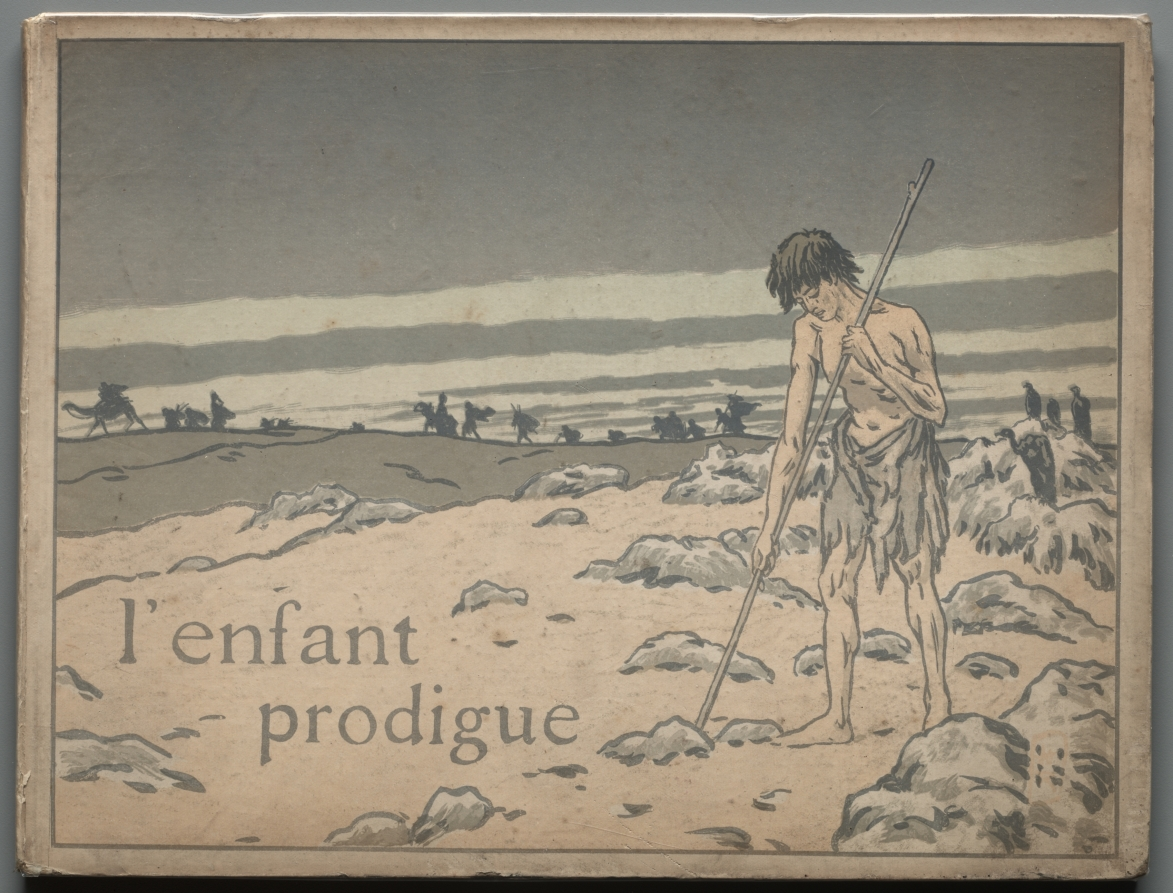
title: The Prodigal Son: Cover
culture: France, 19th century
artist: Henri Rivière (French, 1864–1951)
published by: E. Flammarion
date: 1895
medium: 17 color lithographs in a bound volume illustrating the poetry and music of Georges Fragerolle: color lithograph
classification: Bound Volume